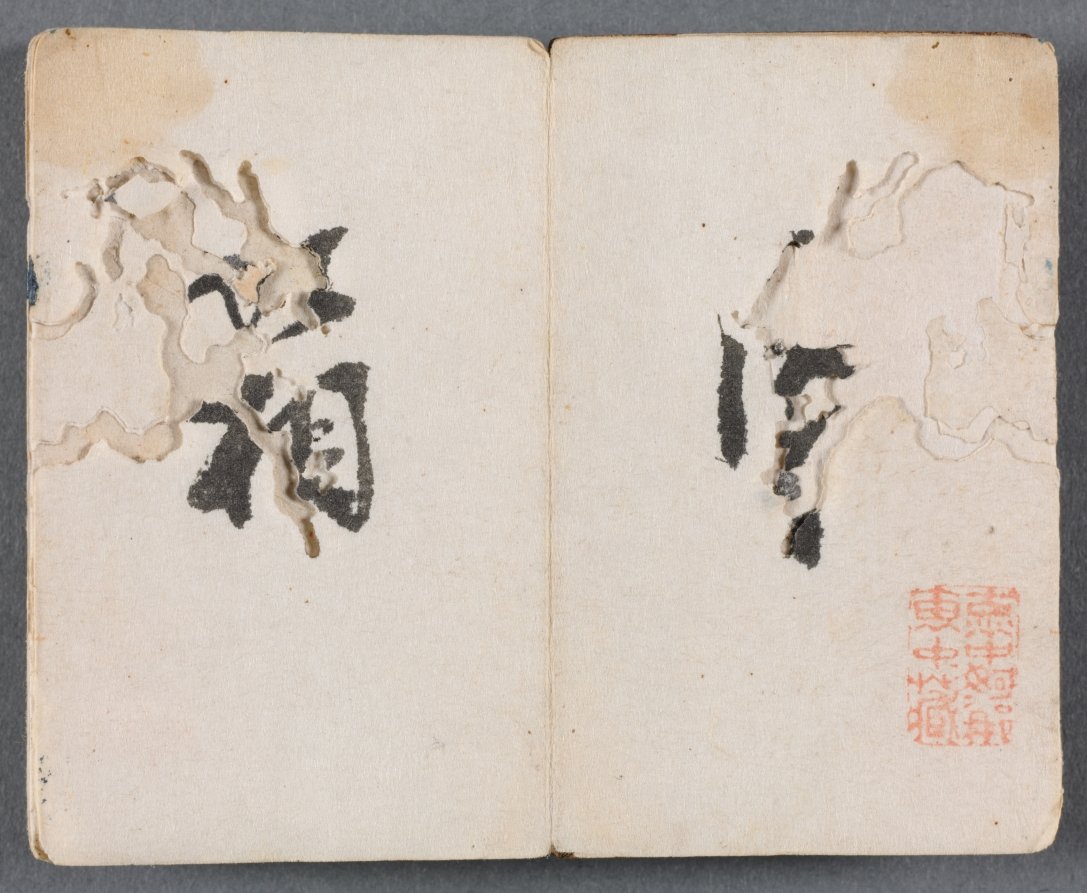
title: Miniature Album with Figures and Landscape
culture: China, Qing dynasty (1644–1911), Qianlong reign (1736–95)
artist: Zeng Yandong (Chinese, c. 1751–1827)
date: 1822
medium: Album of twelve leaves, ink and color on paper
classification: Painting